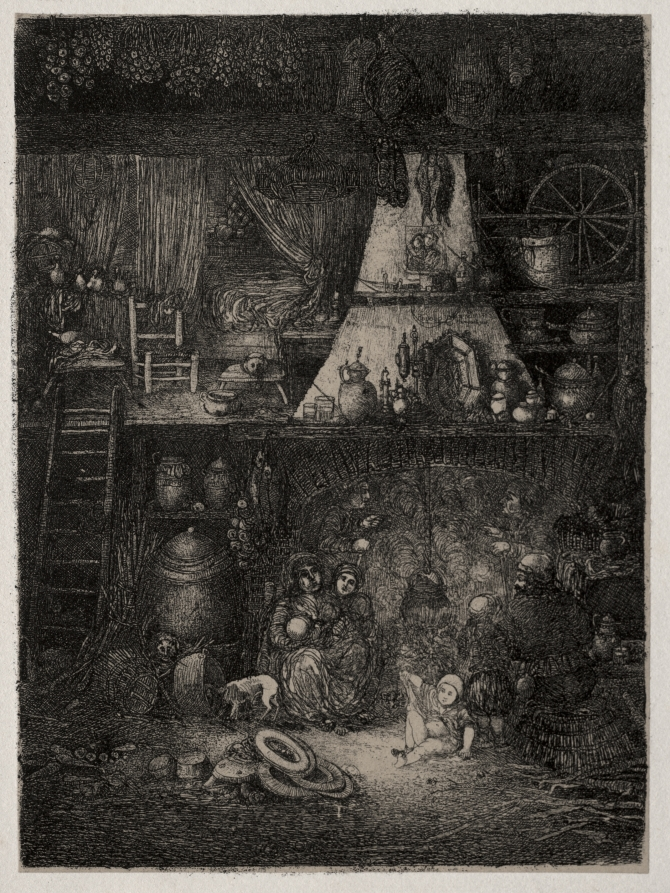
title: Peasant Interior in the Haute-Garonne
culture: France, 19th century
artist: Rodolphe Bresdin (French, 1822–1885)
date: 1858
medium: lithograph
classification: Print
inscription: center, in stone: Rodolphe Bresdin 1858 chingachouck (almost invisible)